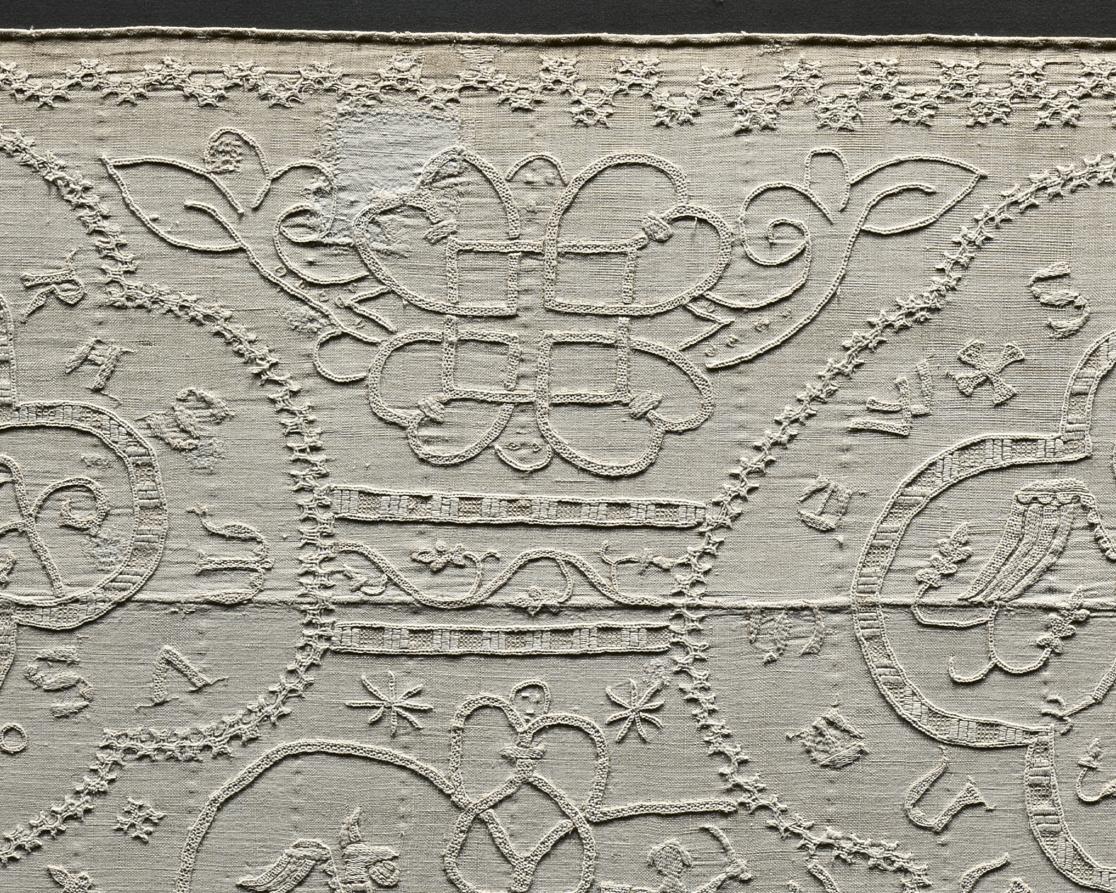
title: Altar Cloth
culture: Germany, Altenberg on the Lahn, Premonstratensian Convent, 14th century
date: c. 1350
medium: embroidery: linen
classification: Embroidery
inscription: various motifs enclosed in quatrefoils with identifying inscriptions in Gothic letters.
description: This large, embroidered altar cloth is one of the rarest, most important medieval church furnishings in existence. It was stitched by nuns in the Premonstratensian Convent in Altenberg on the Lahn River, north of Frankfurt, Germany, and was used to cover the church’s high altar in the weeks leading up to Easter. The cloth is an example of linen embroidery, a specialty of German nuns in the later Middle Ages. The Altenberg monastery church once had valuable furnishings; the high altar retable (a decorated frame with sculptures and paintings on the top of an altar) has survived, the main parts of which are now in the Städel Museum in Frankfurt, Germany.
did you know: When lit from behind, the previously hidden details emerge and the complex design becomes evident.